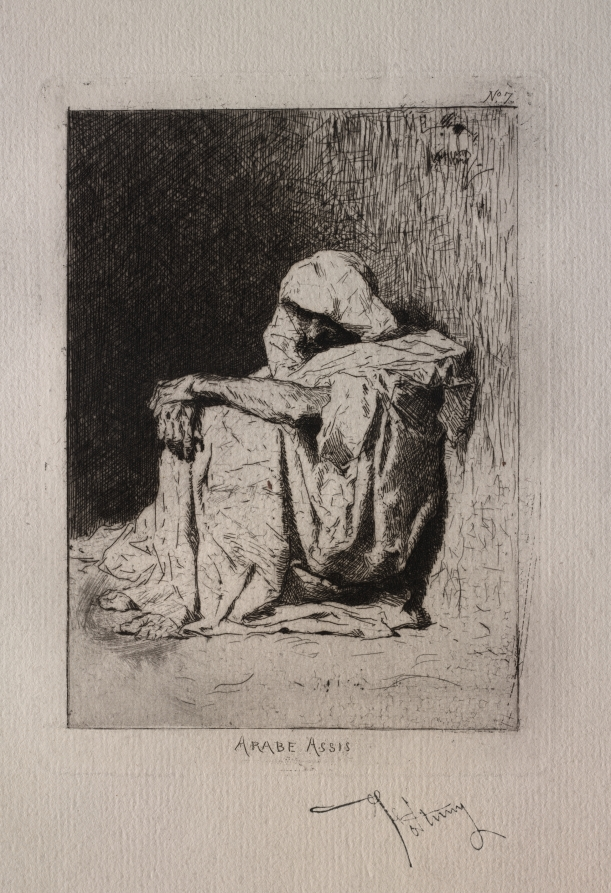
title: Seated Arab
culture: Spain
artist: Mariano Fortuny (Spanish, 1838–1874)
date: 1873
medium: etching and aquatint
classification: Print